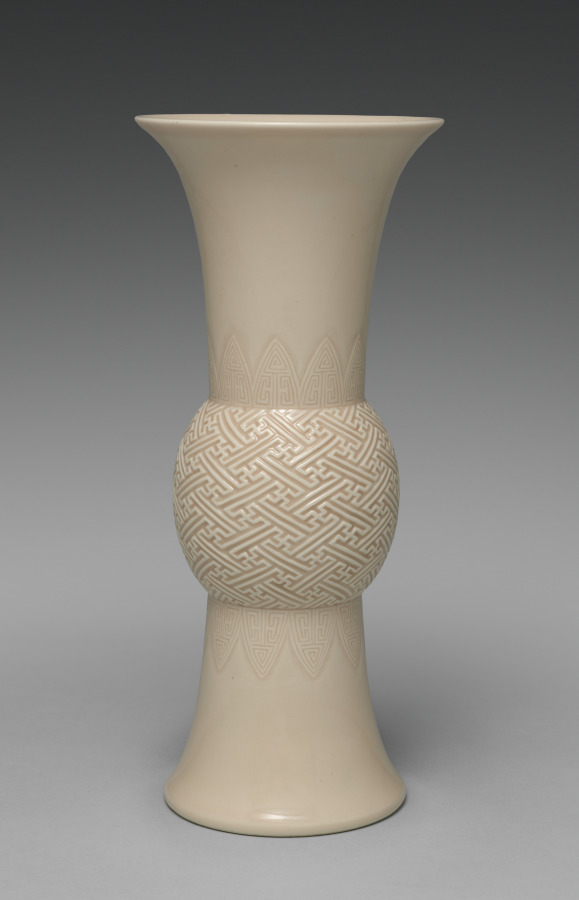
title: Gu-Shaped Flower Vase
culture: Japan, Meiji period (1868–1912)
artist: Seifū Yohei III (Japanese, 1851–1914)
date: 1893–97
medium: Glazed porcelain with molded and carved designs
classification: Ceramic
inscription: 大日本清風造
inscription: This gu-shaped vase has “cherry blossom glaze” (ōkayū), according to the inscription on its box.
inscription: A label affixed to the side of the box gives a sense of how previous owners conceived of the piece. Although the label is partially abraded, one can make out the character nezu 鼠, used in the names of numerous light pinks, from Naniwa pink (Osaka pink) to Miyako pink (Kyoto, or capital, pink). Also legible is the phrase hakugōrai, a broad term that can describe a shade of white associated with ceramics discovered in Korean tombs, but often applied to other ceramics of similar coloration, many from Chinese kilns, including Ding (J. Tei) ware of the Northern Song dynasty.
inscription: 清風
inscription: 帝室技芸員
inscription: 清風與平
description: Seifū Yohei III was the most prominent head of a ceramics studio in Kyoto that specialized in Chinese-style porcelains and especially items for use in sencha (煎茶), or the drinking of steeped-leaf tea with companions. Sencha was popular among the bunjin of Kyoto and Osaka, who often enjoyed it as part of their emulation of Chinese culture. While sencha was by design less formal than the Japanese tea ceremony, it still featured the display of treasured objects. Prized Chinese antiquities were generally unobtainable, so substitutes such as the Gu-Shaped Flower Vase were much in demand.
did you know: This gu-shaped vase has “cherry blossom glaze” (ōkayū), which Yohei III invented in 1890.